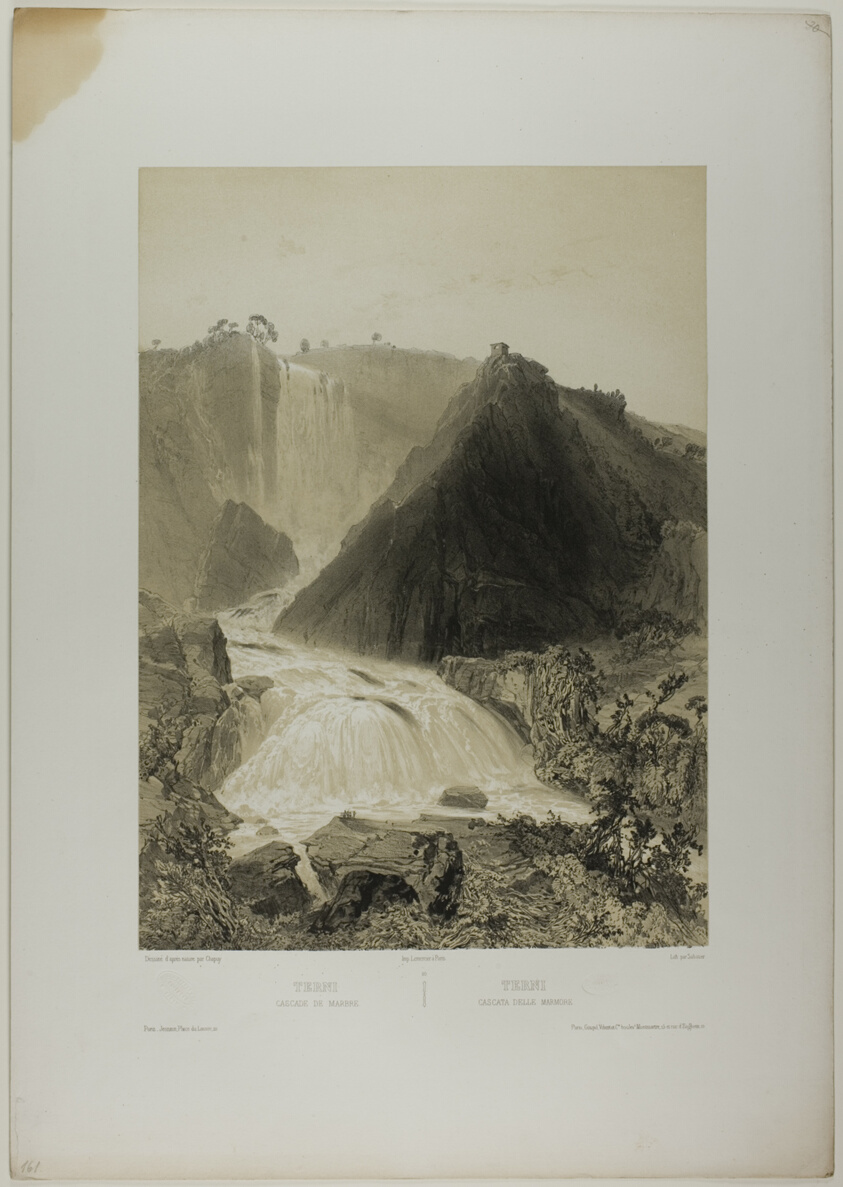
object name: Print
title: Terni: Marble Falls, plate twenty from Italie Monumentale et Pittoresque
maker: Nicolas Chapuy (French, 1790-1858); printed by Sabatier (French, active 1848)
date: c. 1848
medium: Lithograph from two stones on white wove paper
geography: France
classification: lithograph; print; prints and drawing